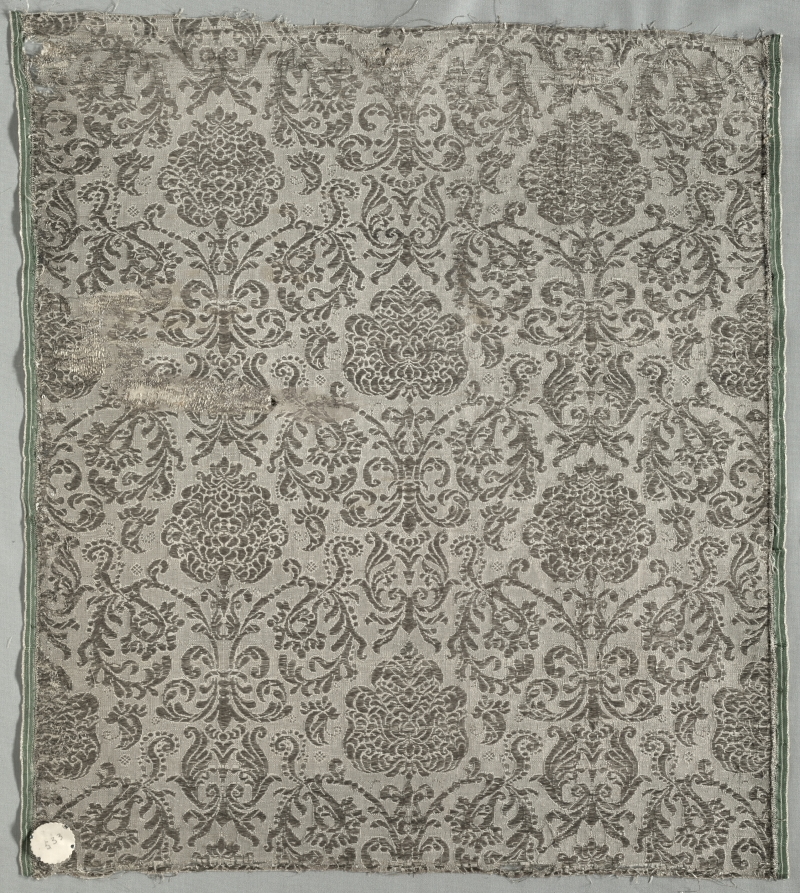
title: Length of Textile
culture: Italy, 18th century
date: 1700s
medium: plain cloth; silk and metal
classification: Textile